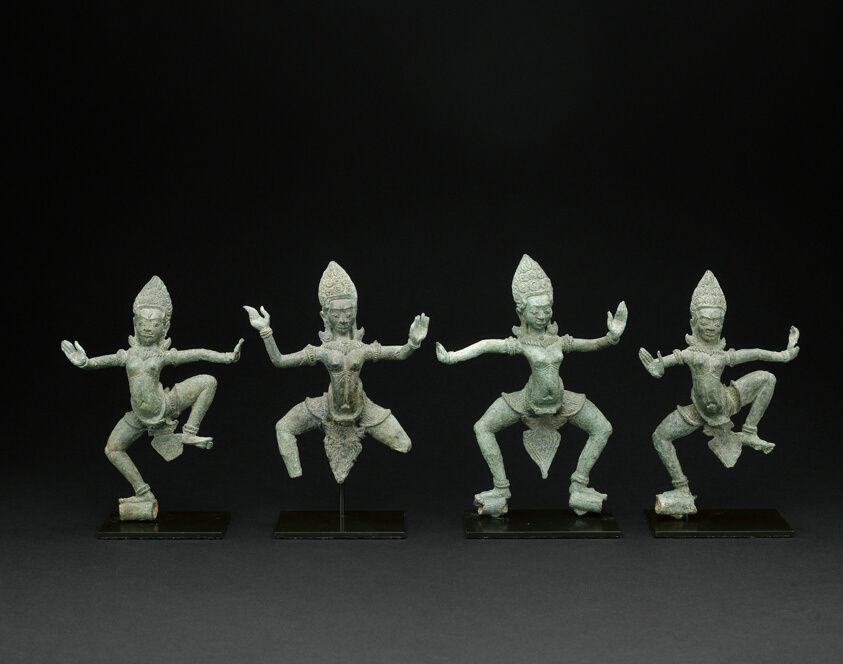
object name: Sculpture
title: Group of Four Celestial Dancing Beauties (Apsaras)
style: Southeast Asian, angkorean, cambodian, asian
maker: Cambodia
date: Angkor period, late 12th/early 13th century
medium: Bronze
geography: Cambodia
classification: bronze; asian art; sculpture